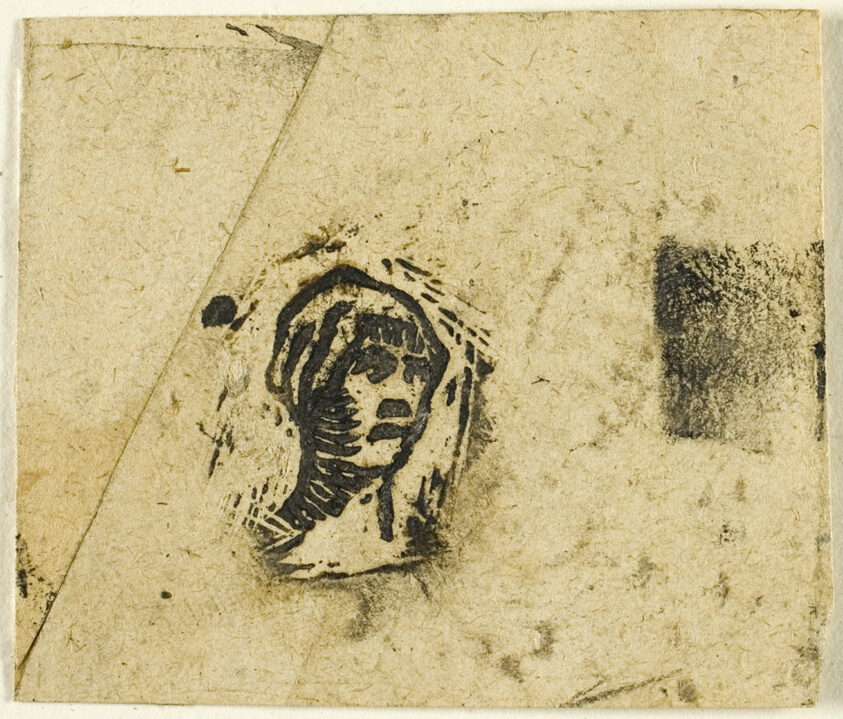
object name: Print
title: Sketches, Fragment: Head of a Woman Wearing a Kerchief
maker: Jean François Millet (French, 1814-1875)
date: after 1863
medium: Woodcut fragment from a partially printed block on tan wove paper with separate matting and original backing with inscription in dark brown ink on white wove lined card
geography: France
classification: woodcut; print; prints and drawing